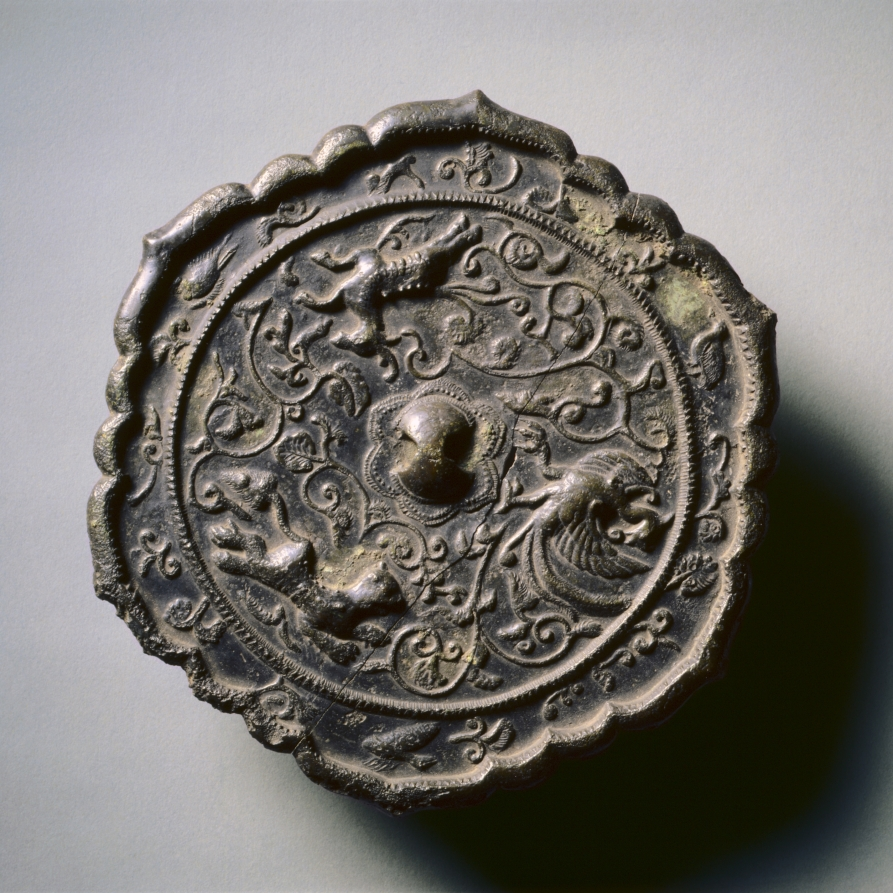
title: Hexafoil Mirror with Floral Interlaces, a Phoenix, and Running Animals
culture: China, Tang dynasty (618-907)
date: early 600s-early 900s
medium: bronze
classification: Metalwork